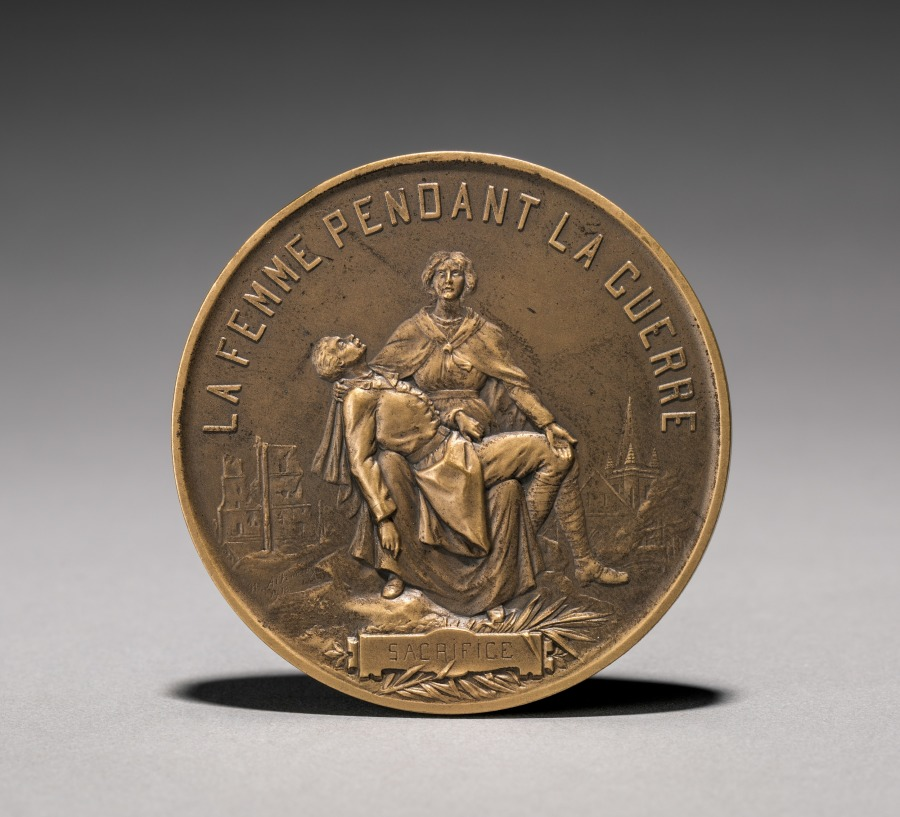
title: Medallion (obverse)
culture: France, 19th-20th century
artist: Henri Emile Allouard (French, 1844–1929)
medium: bronze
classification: Metalwork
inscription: "Sacrifice. La femme pendant la Guerre" (woman during the war); signed: "H. Allouard 1918."